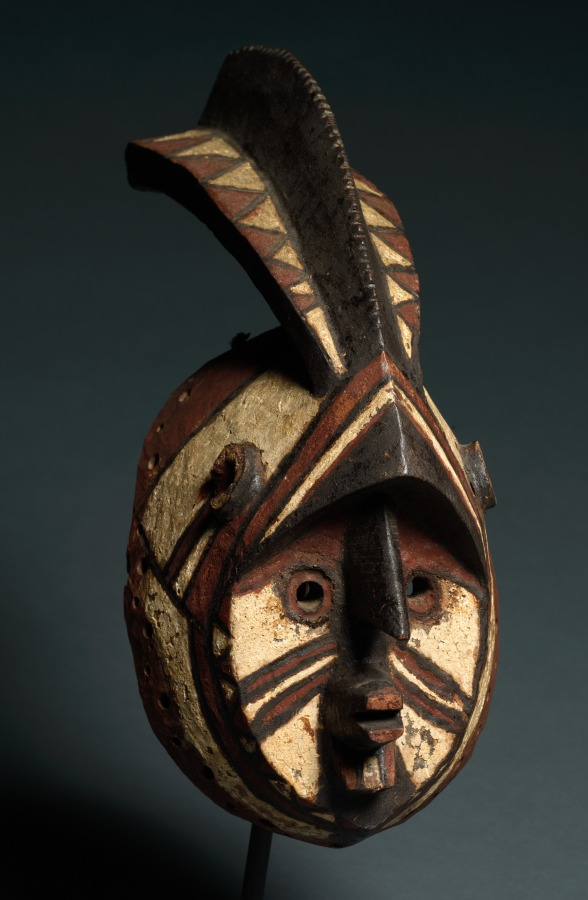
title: Mask (wan-balinga)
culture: Africa, West Africa, Burkina Faso, Mossi-style blacksmith-carver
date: early 1900s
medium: Wood and paint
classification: Mask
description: Only the farmers among the Mossi people employ masks. This mask’s proper name, wan-balinga, evokes a mythical figure who was the mother of the first Mossi ruler. Such masks are most typically worn and danced with on the occasion of the funeral of a male or female elder as escorts of the corpse to the grave. They also appear during annual memorial services that occur months after the actual burial, when all the deceased clan members are commemorated and honored.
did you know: This mask was worn and danced upon the death of an elder, escorting the corpse to the grave.